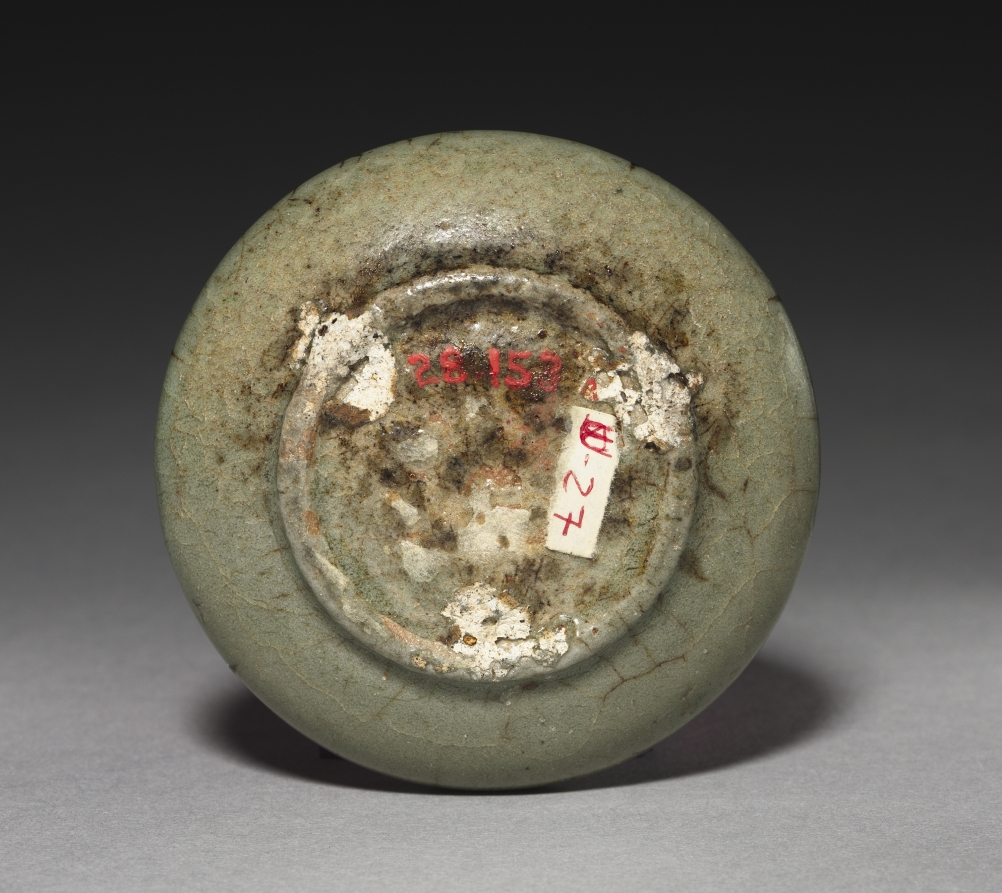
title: Oil Bottle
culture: Korea, Goryeo dynasty (918–1392)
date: 1100s–1200s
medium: celadon ware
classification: Ceramic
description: Celadons, spoons, seals, and bronze mirrors were the most common burial objects in tombs during the Goryeo period (918–1392). Once used to contain oil treatment for hair, this little celadon bottle was one of the standard goods that furnished elites' tombs.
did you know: This bottle was used to contain oil treatment for hair.